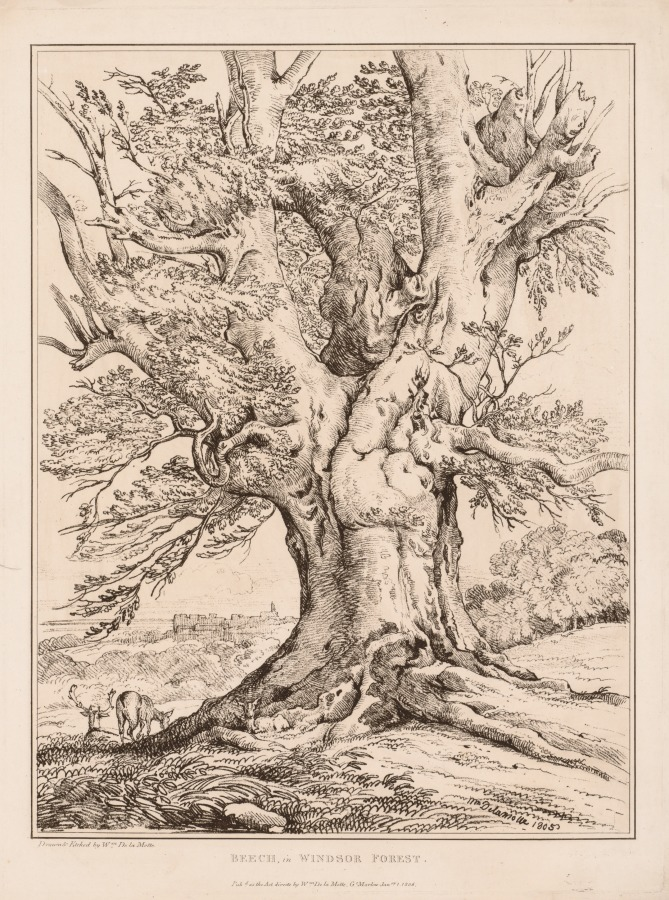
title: Beech in Windsor Forest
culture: England, early 19th Century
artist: William Alfred Delamotte (British, 1775–1863)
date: 1805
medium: engraving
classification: Print